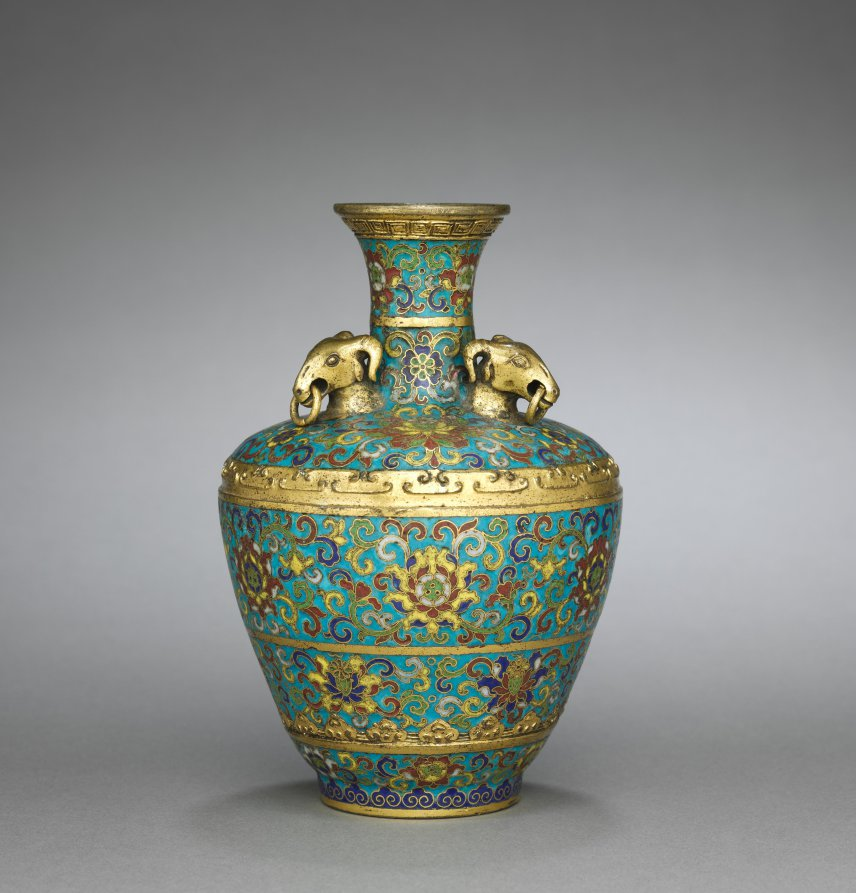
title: Vase with Three Rams' Heads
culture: China, Jiangxi province, Jingdezhen, Qing dynasty (1644-1911), Qianlong mark and reign (1736-1795)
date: 1736–1795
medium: cloisonné enamel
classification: Enamel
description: In cloisonné enameling, the decorative patterns are outlined by soldering metal wires (usually copper) to a metal base, creating a network of cells, or cloisons, to be filled with powdered enamels. After firing, the enamels are polished to create a smooth surface level with the cloisons. The exposed metal surfaces are gilt.